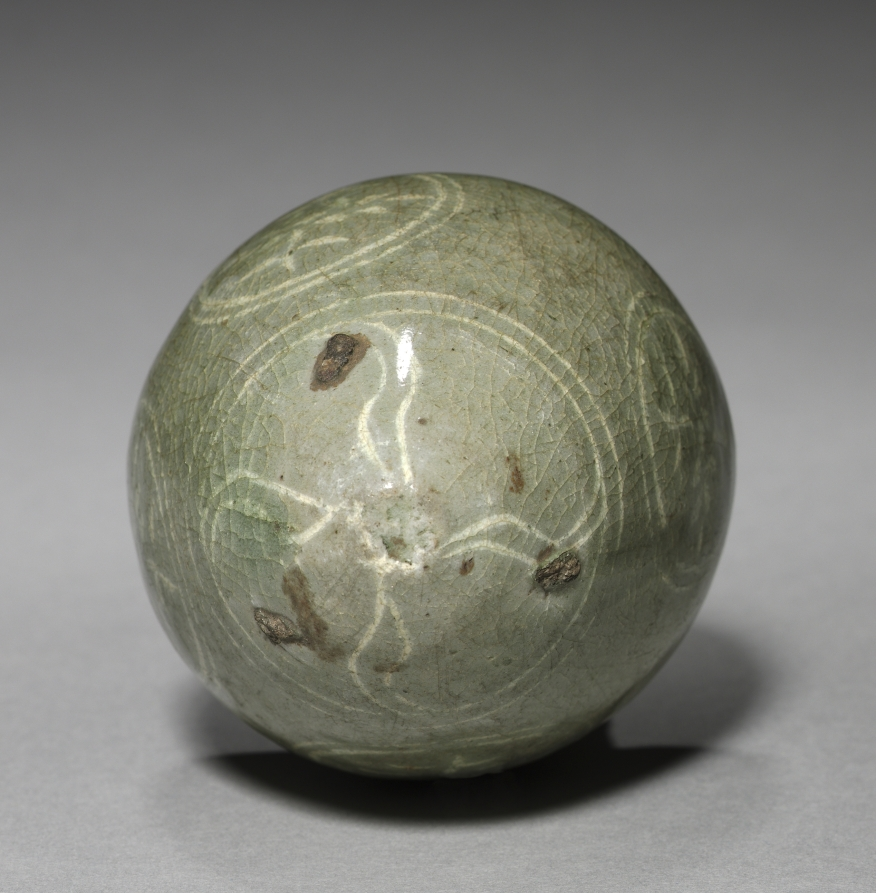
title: Cup with Inlaid Chrysanthemum Design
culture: Korea, Goryeo dynasty (918–1392)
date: 1200s-1300s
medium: pottery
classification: Ceramic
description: Toward the late 14th century, the overall quality of techniques involved in making celadon works sharply deteriorated. In contrast to translucent greenish blue celadon works of the 12th century, this drinking cup possibly dated to the late 14th century, has gray greenish glaze. And its inlaid design also shows a clear sign of decline in craftsmanship. Nevertheless, less attention to techniques gave a way to a freer style of pottery called buncheong in the succeeding centuries.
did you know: This distinctively shaped cup with a pointy base is known to have been used on horseback.